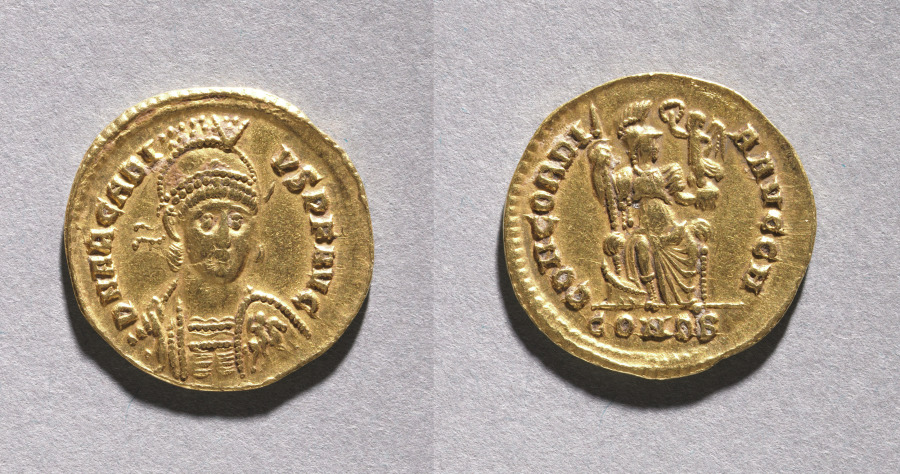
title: Tremissis of Honorius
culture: Byzantium, Ravenna, Byzantine period, late 4th-early 5th Century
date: 395–423 CE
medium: gold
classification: Coins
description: Byzantine Gold Coins The vast number of surviving Byzantine coins attests to the level of trade across the empire. Controlled and supervised by the emperor, the producers of coins took care to represent his authority and reflect his stature. Talented artists were recruited to engrave the dies (molds) used for the striking of coins. Emperors increasingly came to include their heirs and co-emperors on their coinage, as well as other family members or even earlier rulers. Coins were recognized, then as now, as small, portable works of art. With their inscriptions and images, Byzantine coins provide valuable documentation of historical events and a record of the physical appearance of the emperors. The coins shown here include the solidus, the basic gold coin of 24 karats; the tremissis, a gold coin of one-third the weight and value of the solidus; and the nomisma, which in the 10th century replaced the solidus as the standard gold coin.